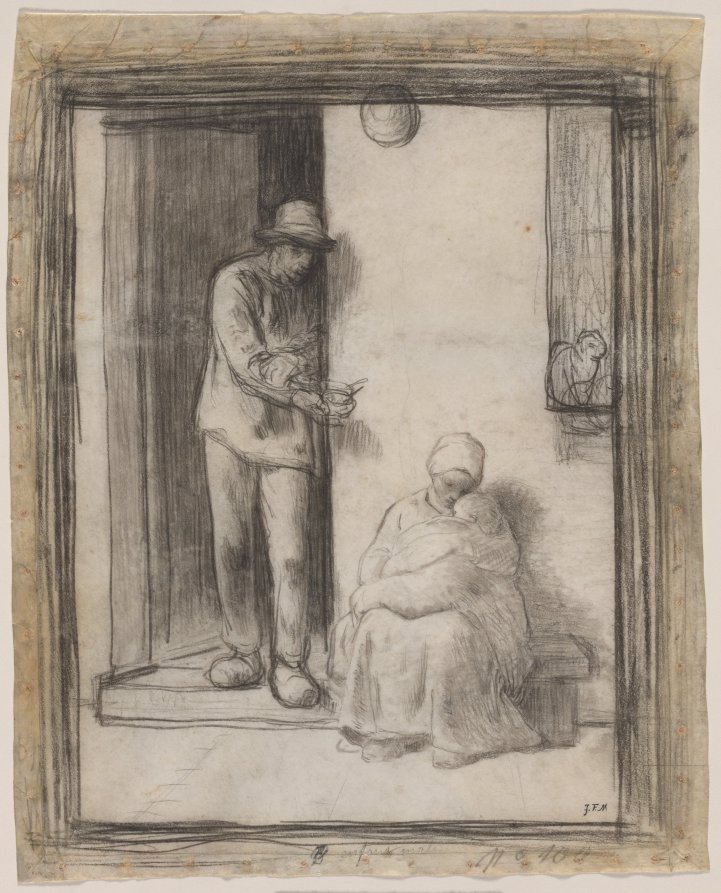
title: The Sick Child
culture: France, 19th century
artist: Jean-François Millet (French, 1814–1875)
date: 1858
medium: black crayon; framing lines in black crayon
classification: Drawing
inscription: by artist?, lower center, in black chalk: enfant mala[de] [partially erased] ; by artist?, lower center, in black chalk: 5 ; in graphite, lower center: [illegible: circled number?][written over the 5] ; lower center, in graphite: No 100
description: Jean-François Millet’s paintings of French rural life, especially those of peasants and farmers in their working environment, redefined the imagery of everyday life in the nineteenth century. Large-scale paintings such as The Gleaners (1857) presented the poorest of laborers with a dignity and nobility informed by classical traditions in French painting. At the same time he was working on major paintings for public exhibitions, Millet was also making smaller-scale drawings. Since drawings were less expensive, there was a much larger market for this type of work, and Millet created finished sheets in both black crayon and pastel as he catered to this demand. The work shown here is the first version of a theme the artist drew again in pastel in a more finished version (now lost). This crayon drawing shows, on the other hand, Millet’s thinking process. We can see him working out the composition because several changes are visible, most notably in the bowl held by the father and the cat in the window. Though taken from everyday life, Millet’s tender treatment of this family group recalls the biblical subject of the Holy Family.